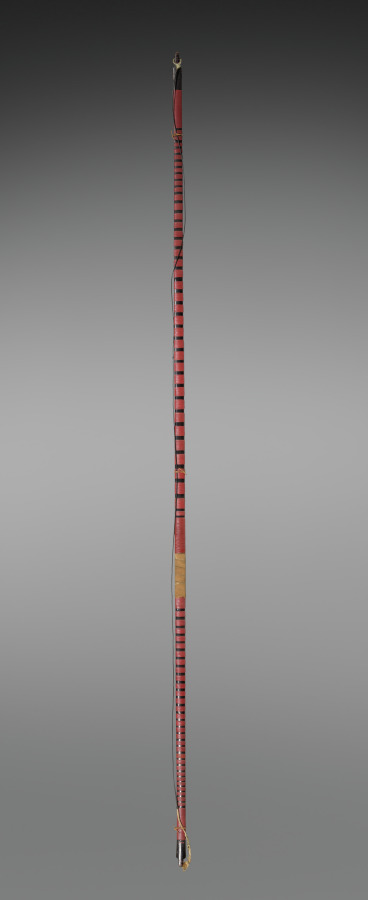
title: Bow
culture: Japan, Edo period (1615–1868)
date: early to mid-1800s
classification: Arms and Armor